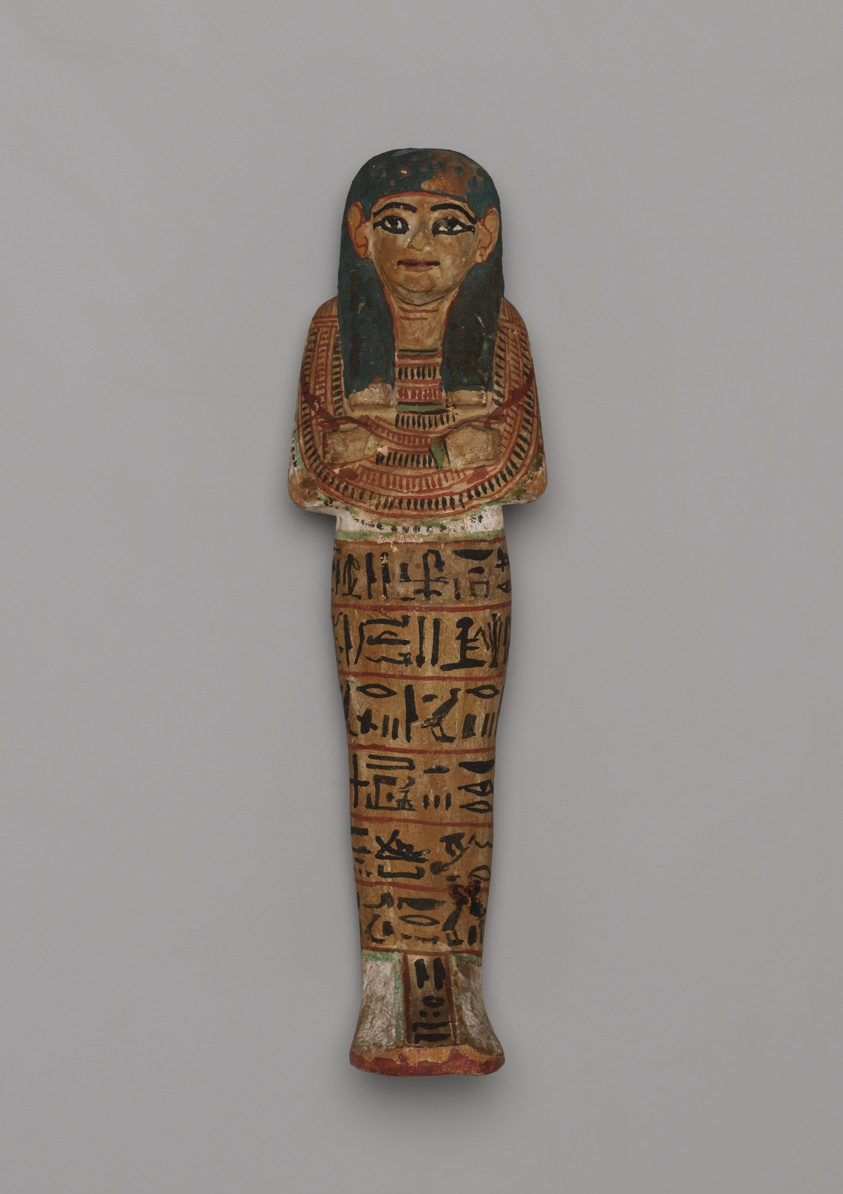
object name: Funerary Object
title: Shabti (Funerary Figurine) of Mayat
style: new kingdom, ancient, egyptian, nineteenth dynasty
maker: Egyptian; probably Thebes (modern Luxor), Egypt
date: New Kingdom, Dynasty 19 (about 1295–1186 BCE)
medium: Wood, gesso, and pigment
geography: Egypt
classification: ushabti; wood; funerary; figurine; ancient art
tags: funerary art, Hieroglyphs, mummies, women